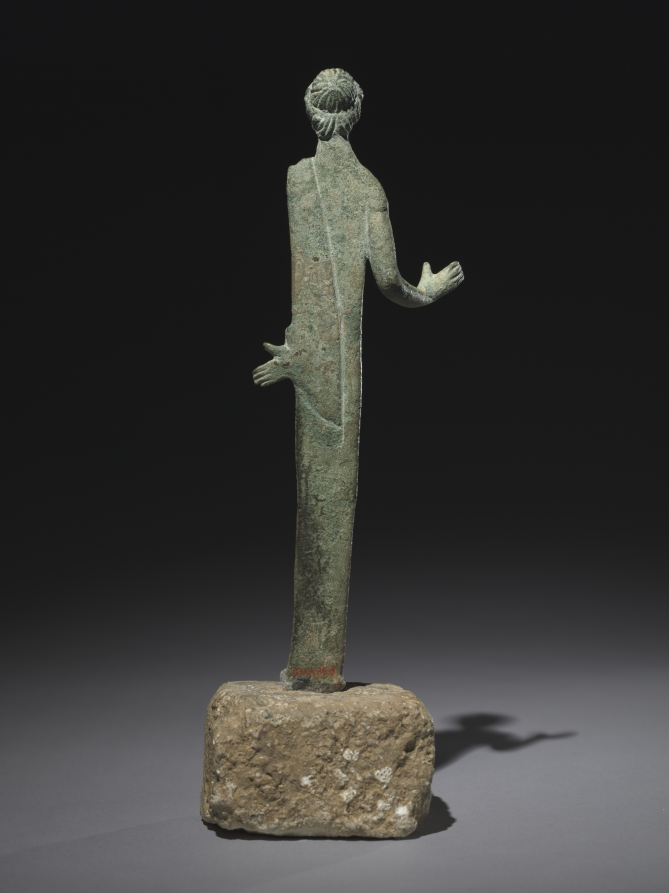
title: Male Votive Figure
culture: Etruscan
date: 300s BCE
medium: bronze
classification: Sculpture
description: This Etruscan votive figure is posed with his hands turned to expose his palms, one near his hip, the other projecting laterally. With the exception of the fully three-dimensional head and the extended right arm and hand, the side profile of this figure is shockingly flat. The tall man’s back is not only extremely thin but also an almost perfectly vertical column. Other examples of this votive figure type are even more elongated, and some hold small cups or libation dishes, as if making offerings. Some scholars have suggested that these votive figures may represent shadows due to their extreme height and relative lack of depth, while others have seen connections to much older traditions of relatively flat cult images, whether of wood or metal.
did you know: This bronze statuette was cast in a single piece.